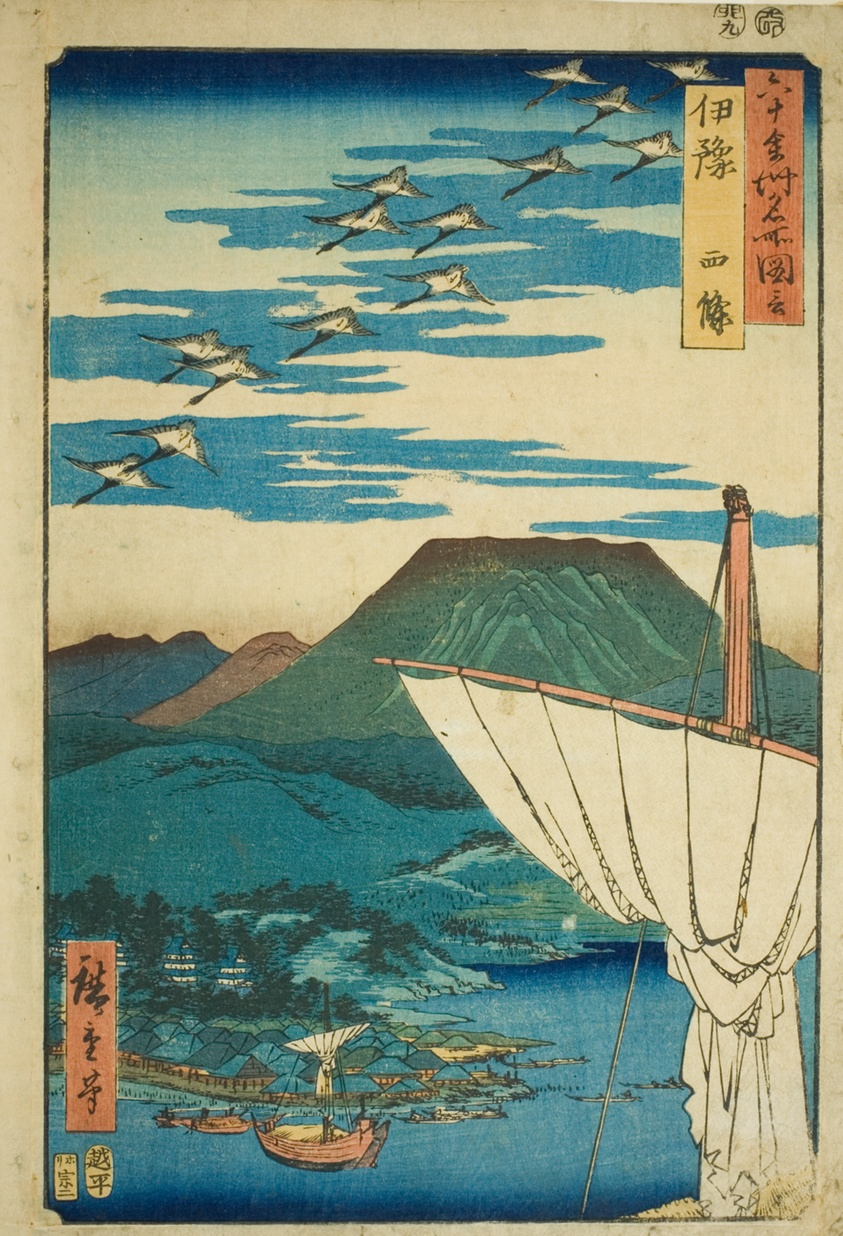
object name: Print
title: Iyo Province: Saijo (Iyo, Saijo), from the series "Famous Places in the Sixty Provinces (Rokujuyoshu meisho zue)"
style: Japanese (culture or style)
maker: Utagawa Hiroshige 歌川 広重; Japanese, 1797-1858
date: 1855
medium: Color woodblock print; oban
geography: Japan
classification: woodblock print; print; asian art